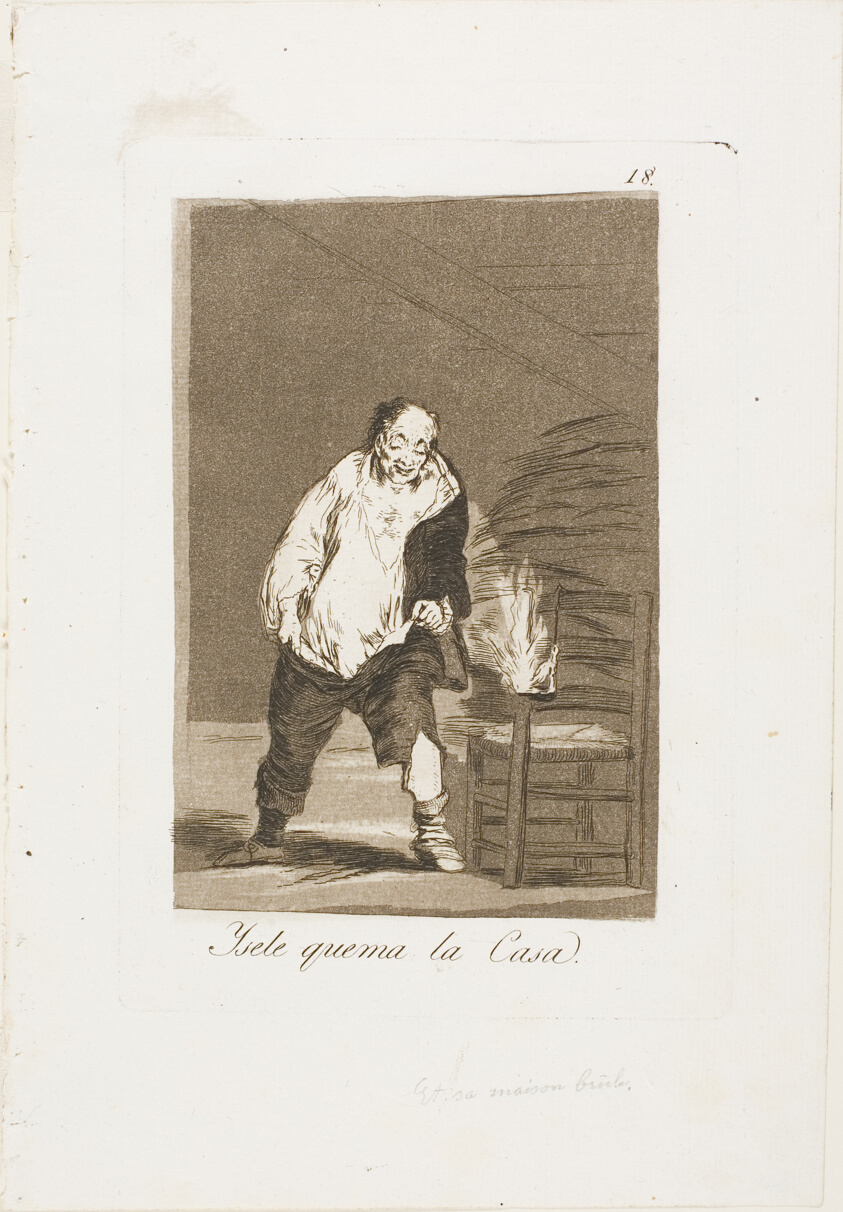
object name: Print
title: And his house is on fire, plate 18 from Los Caprichos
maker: Francisco José de Goya y Lucientes (Spanish, 1746-1828)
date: 1797/99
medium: Etching and aquatint on ivory laid paper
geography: Spain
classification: etching; print; prints and drawing